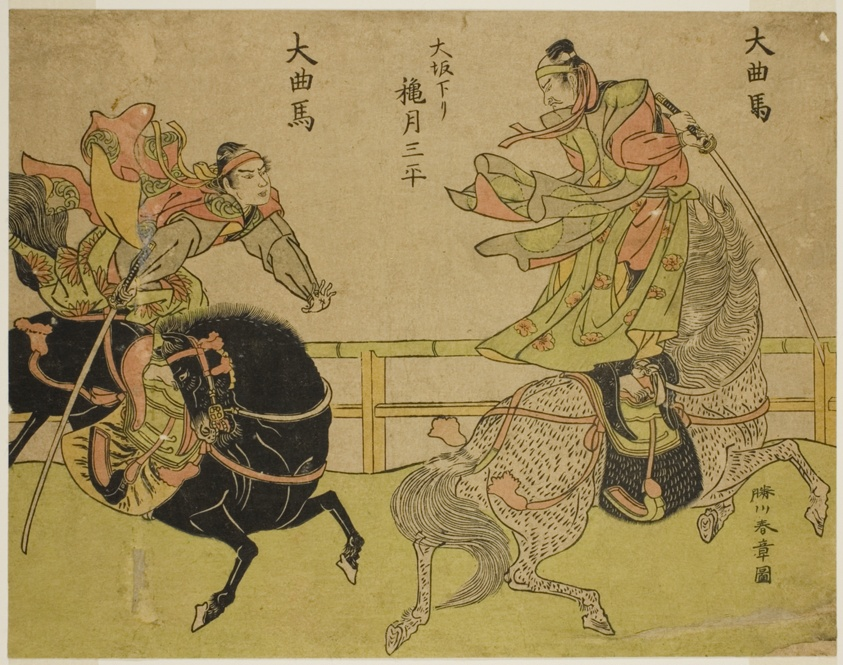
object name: Print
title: The Actor Akizuki Sampei from Osaka Standing on a Galloping Horse (right), in the Play Dai Kyokuba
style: Japanese (culture or style)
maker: Katsukawa Shunsho 勝川 春章; Japanese, 1726-1792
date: c. 1772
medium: Color woodblock print; aiban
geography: Japan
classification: woodblock print; print; asian art